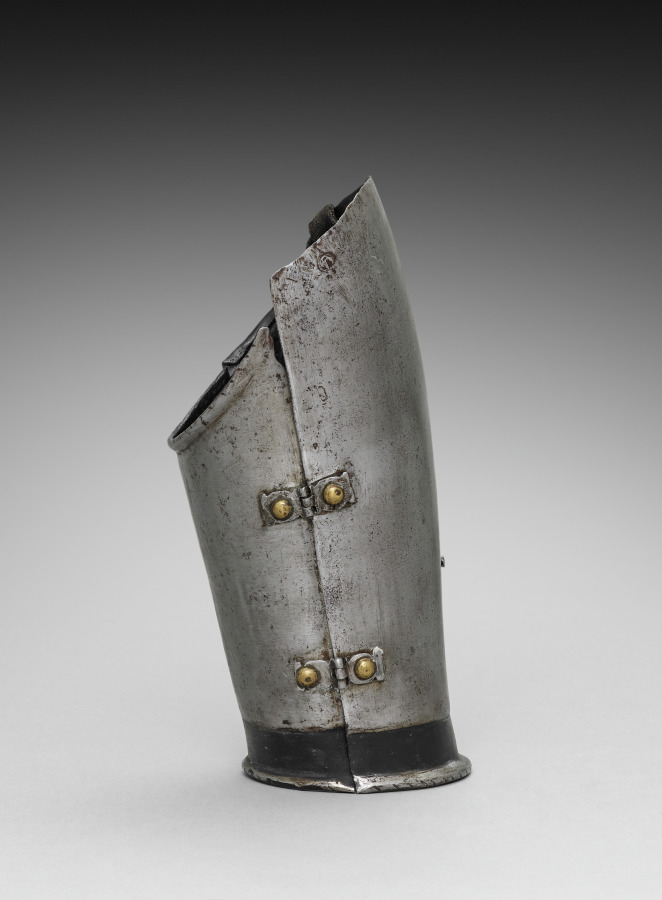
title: Left Vambrace (lower cannon)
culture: Germany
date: c.1550–1570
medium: iron, steel, leather and brass rivets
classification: Arms and Armor